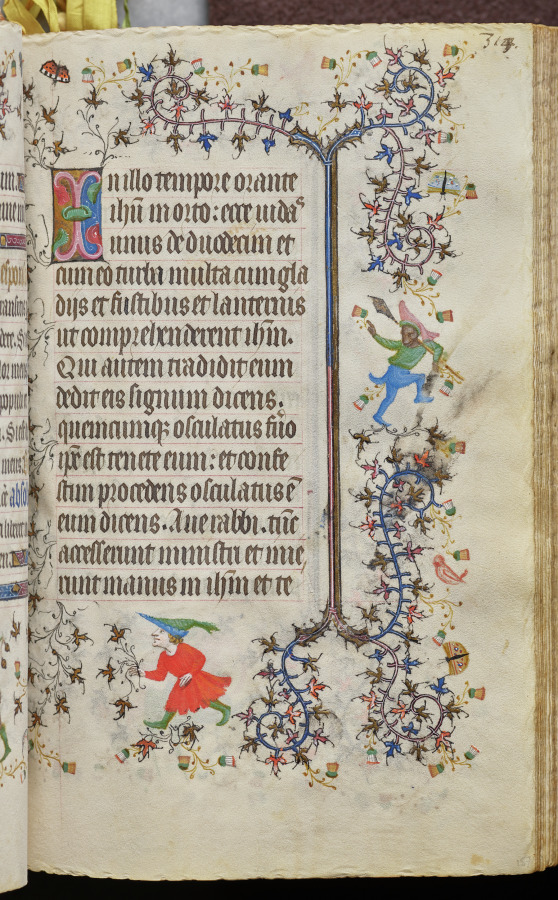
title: Hours of Charles the Noble, King of Navarre (1361-1425): fol. 157r, Text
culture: France, Paris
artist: Master of the Brussels Initials and Associates (French)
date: c. 1405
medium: ink, tempera, and gold on vellum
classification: Bound Volume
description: This precious volume was obviously highly prized by its owner, the French-born King of Navarre, who had his coat of arms painted on no less than twenty folios. Rather than directly commissioning this manuscript from a specific workshop, it seems that Charles the Noble acquired his book of hours -- perhaps ready-made for the luxury market -- while on a trip to Paris in 1404-05. A collaborative effort, six painting styles are evidenced within the pages of this codex, those of two Italians, two Frenchmen, and two Netherlanders. The painter who was responsible for the planning and decoration of the book, and who produced seventeen of the large miniatures, was a Bolognese artist known as the Master of the Brussels Initials. His principal assistant, responsible for most of the borders, was a Florentine who signed his name "Zecho" da Firenze on folio 208 verso.